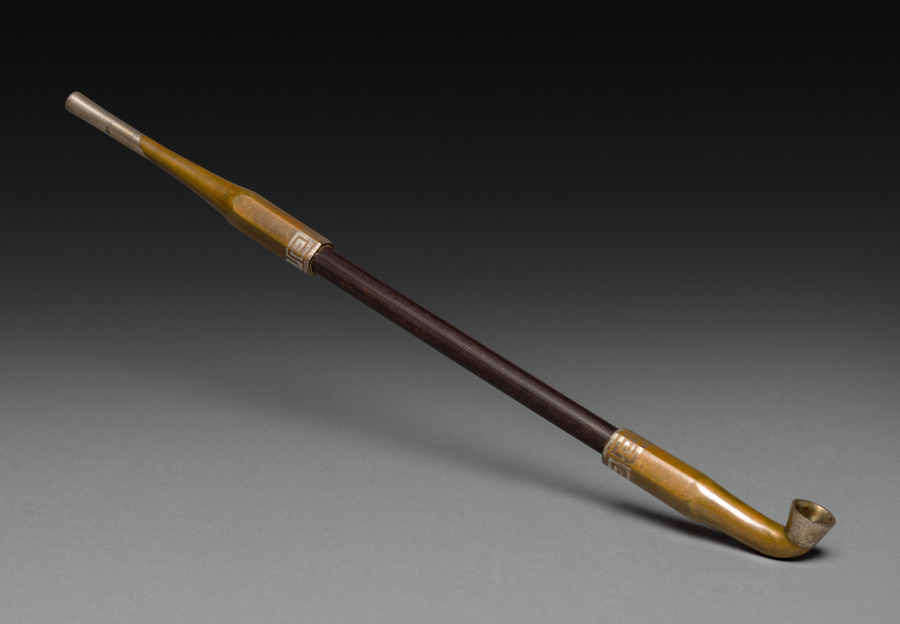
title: Tobacco Pipe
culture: Japan, Edo period (1615–1868)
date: 1700s–mid-1800s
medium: wood and metal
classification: Miscellaneous